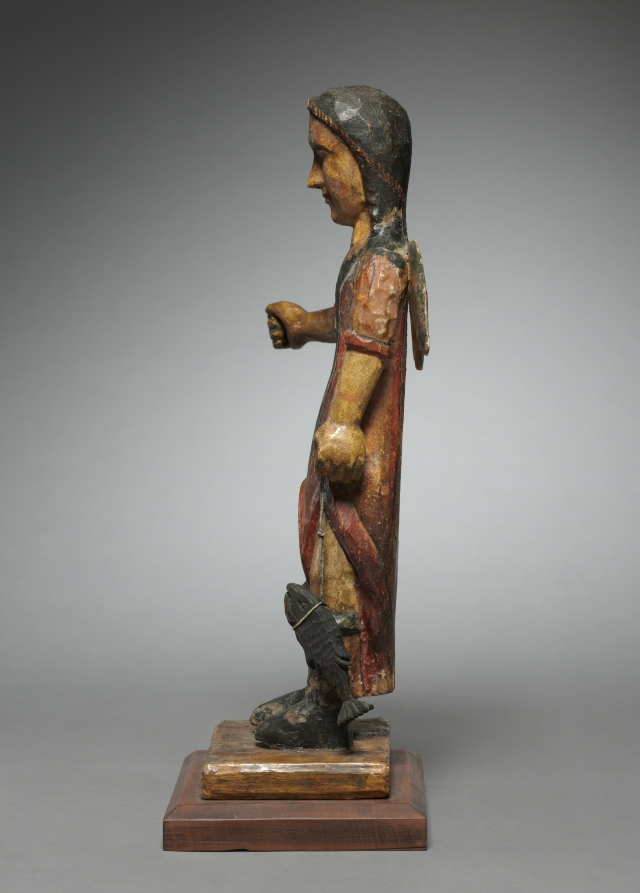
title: San Rafael - Archangel: santo de bulto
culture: America, New Mexico, 17th-18th century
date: 1600s-1700s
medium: painted wood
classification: Sculpture